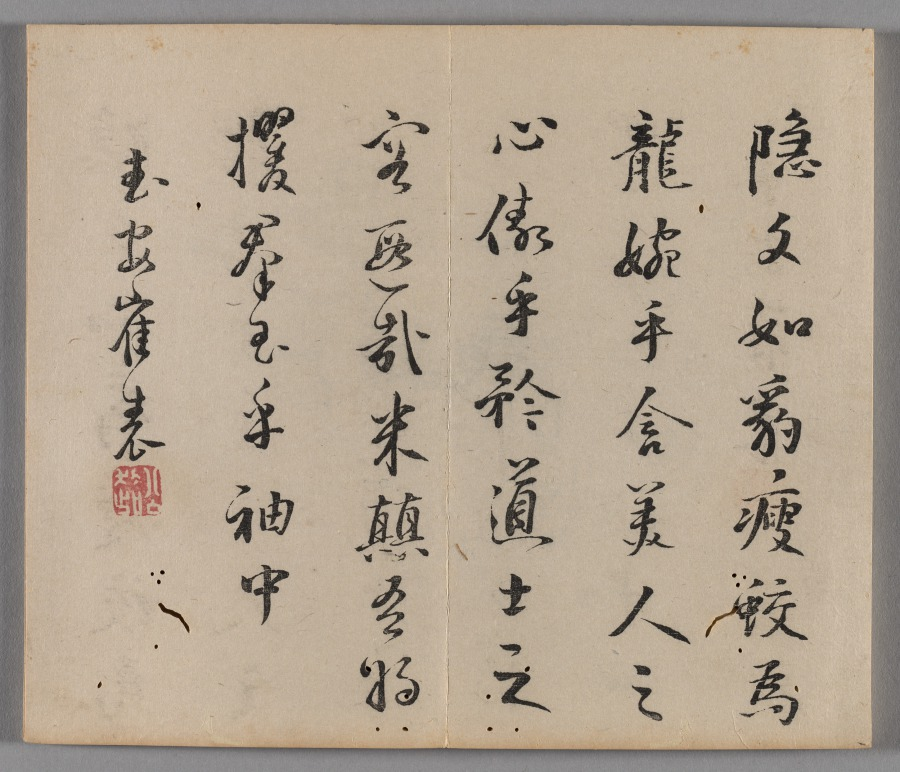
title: Ten Bamboo Studio Painting and Calligraphy Handbook (Shizhuzhai shuhua pu): Rocks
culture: China, Qing dynasty (1644-1911)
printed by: Hu Zhengyan (Chinese, c. 1584–1674)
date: 1633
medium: Woodblock-printed book; ink and colors on paper; first edition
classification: Print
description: Color printing reached a level of perfection in the early 1600s, as seen in this Ten Bamboo Studio Collection of Calligraphy and Painting and the Mustard Seed Garden Manual of Painting (printed 1679 and 1701). The painterly quality, precision in registering (aligning) the woodblocks, and harmonious colors made them the most successful color print editions in Chinese history. Both editions were printed and compiled in Nanjing, spread nationwide, and had a great impact on the arts in Japan and Korea.